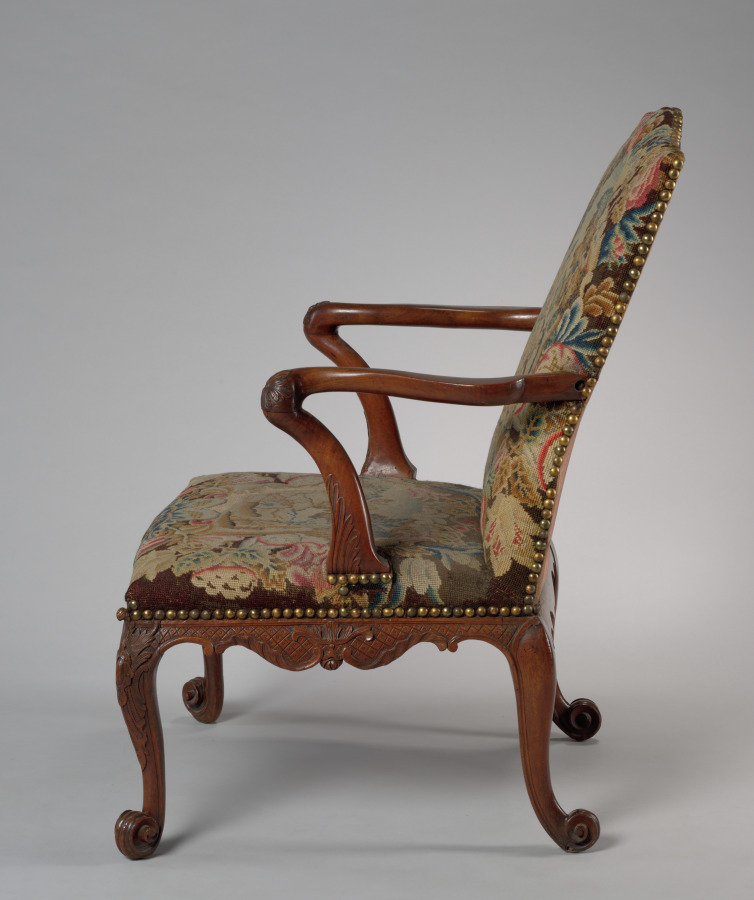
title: Armchair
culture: England, 18th century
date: 1760–1765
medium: mahogany upholstered in needlework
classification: Furniture and woodwork